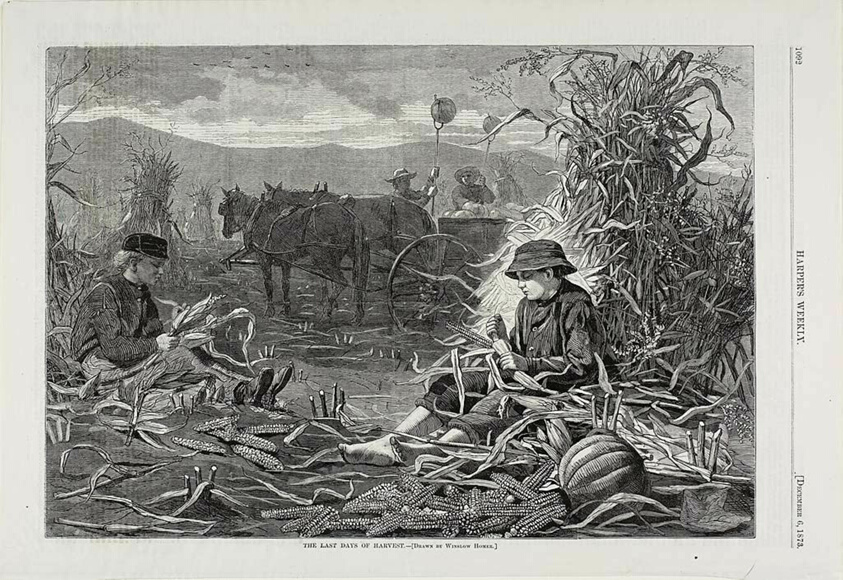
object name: Print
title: The Last Days of Harvest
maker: Winslow Homer (American, 1836-1910); published by Harper's Weekly (American, 1857-1916)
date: published December 6, 1873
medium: Wood engraving on paper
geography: United States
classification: wood engraving; print; prints and drawing